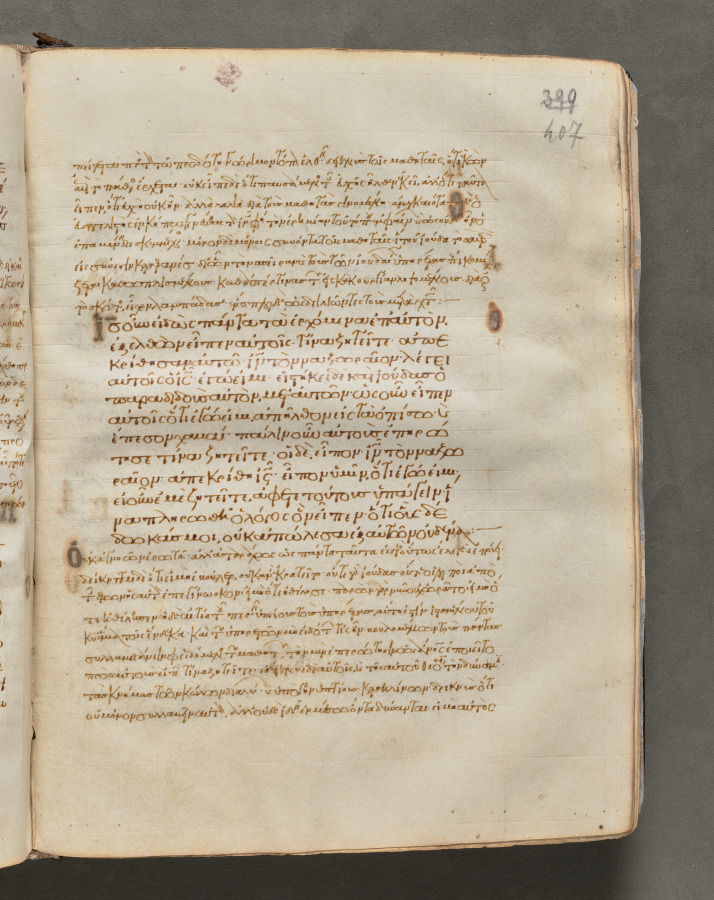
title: Text, folio 407 (recto), from a Gospel Book with Commentaries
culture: Byzantium, Constantinople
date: c. 1000–1100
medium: ink, tempera, and gold on vellum; leather binding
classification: Bound Volume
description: Each of the four gospels in this book opens on a page with brilliantly illuminated borders depicting the author of the text as well as birds—principally peacocks, symbols of the immortality of the soul—and fountains, representing the fountain of life and the salvation of the soul. This volume consists of 428 leaves with texts in Greek. Its level of sophistication suggests that it was probably written and decorated in a monastery in Constantinople.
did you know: Gospel books were carried in procession through Byzantine churches.